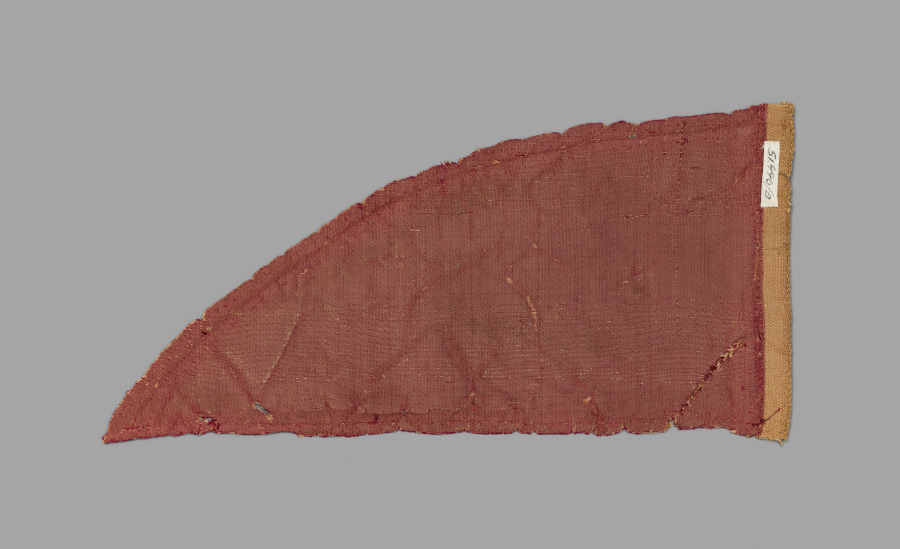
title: Pieces from Disassembled Cape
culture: Italy, 15th century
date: 1400s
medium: velvet (cut and voided); silk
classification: Velvet